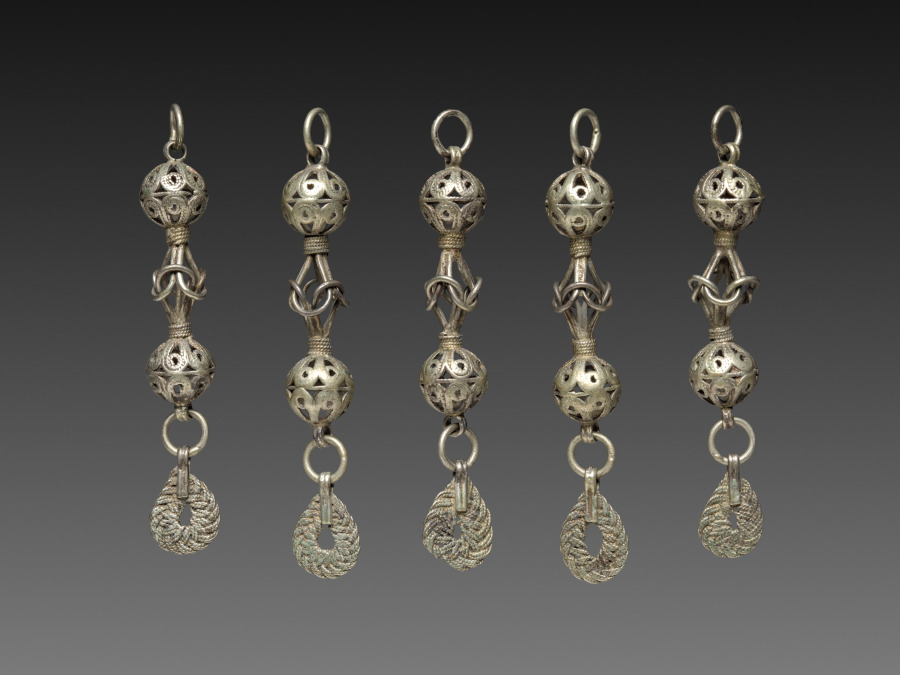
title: Set of Buttons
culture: Balkans(?), 19th century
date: 1800s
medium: silver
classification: Jewelry